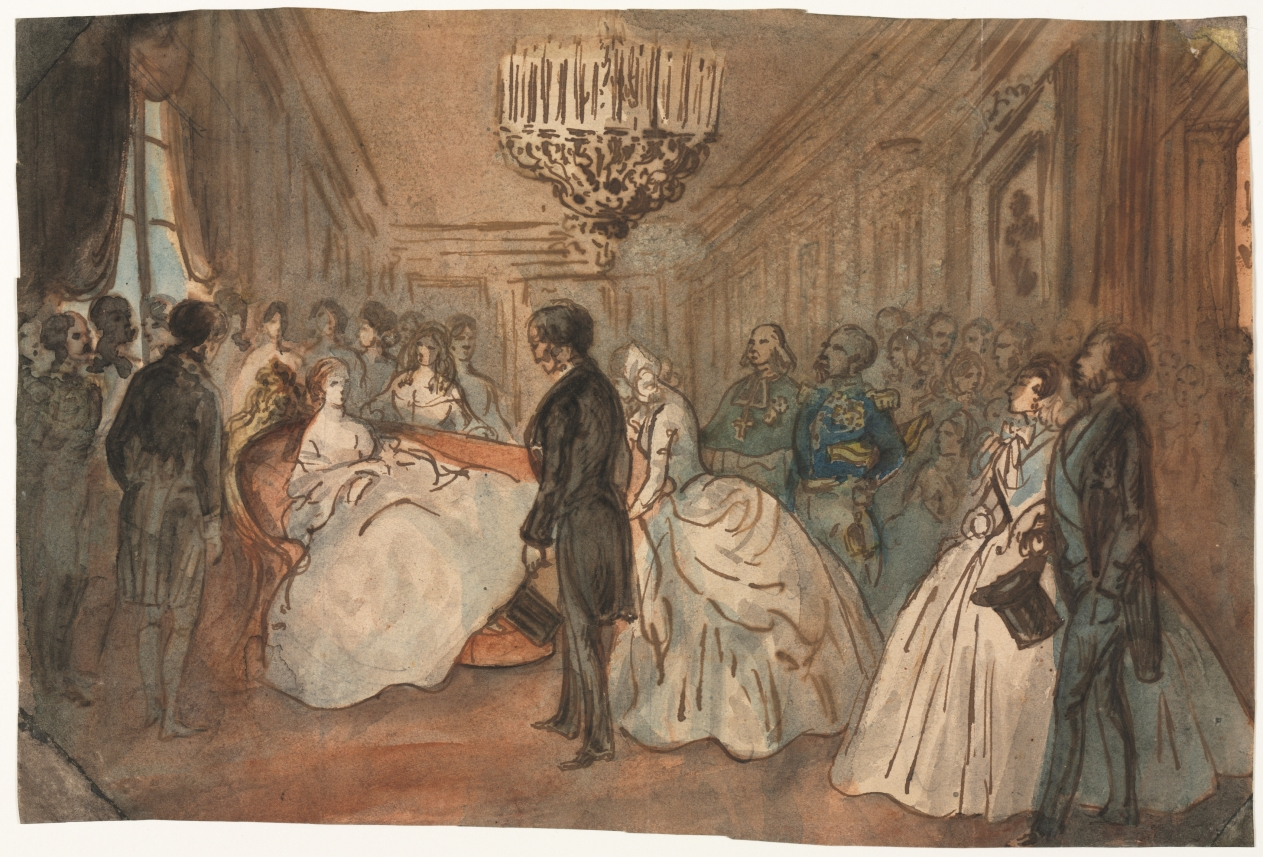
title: The Empress Eugénie Receiving the Diplomatic Corps after the Birth of the Imperial Prince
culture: France, 19th century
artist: Constantin Guys (French, 1805–1892)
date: 1856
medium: pen and brown ink and brush and brown, blue, pink and yellow wash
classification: Drawing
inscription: VERSO, lower center, in graphite: 34 ; ON SEPERATELY APPLIED PIECE OF PAPER (now removed), printed in black ink: From / C.W. KRAUSHAAR / ART GALLERIES / 730 FIFTH AVENUE / HECKSCHER BUILDING / NEW YORK / ESTABLISHED 1885 / [the rest typewritten in black ink] "The Empress (Eugenie) receiving the Corps Diplo- / matique, after the birth of the Prince Imperial" / Water color drawing by / CONSTANTIN GUYS / Collection of Sir William Ingres